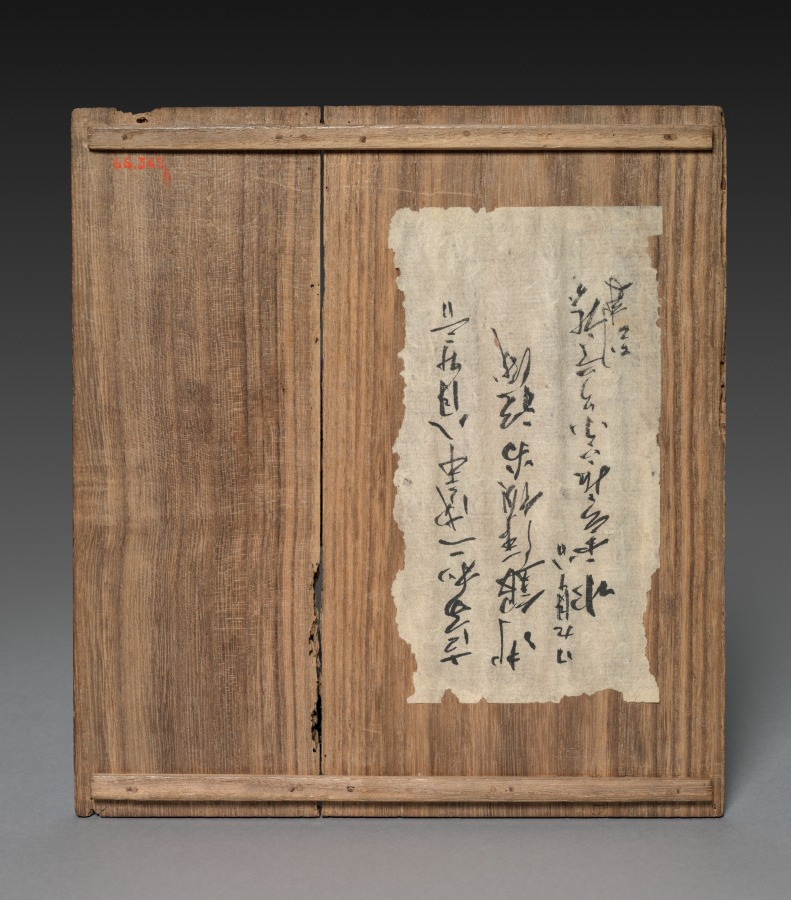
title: Square Dish with Design of Plovers over Waves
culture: Japan, Edo period (1615–1868)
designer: Ogata Kōrin (Japanese, 1658–1716)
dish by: Ogata Kenzan (Japanese, 1663–1743)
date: c. 1700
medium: Glazed stoneware with iron oxide underglaze slip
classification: Ceramic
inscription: design painted by Korin and signed "Jakumei Korin Gaku"; inner and outer faces of four walls probably painted by an assistant at the kiln, underside of dish signed, "Kenzan."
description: The Ogata brothers Kōrin and Kenzan often collaborated on ceramics. This dish is one of a set used for serving tea cakes. Kenzan shaped the dish, after which Kōrin drew the iron oxide design of plovers, a type of shorebird, flying over waves. Kenzan then covered the object with a clear glaze and fired it. Kōrin placed his signature next to his design, while Kenzan signed the back.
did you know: The design of plovers flying over waves derives from Heian period (900s–1100s) literature and later lacquerware designs.